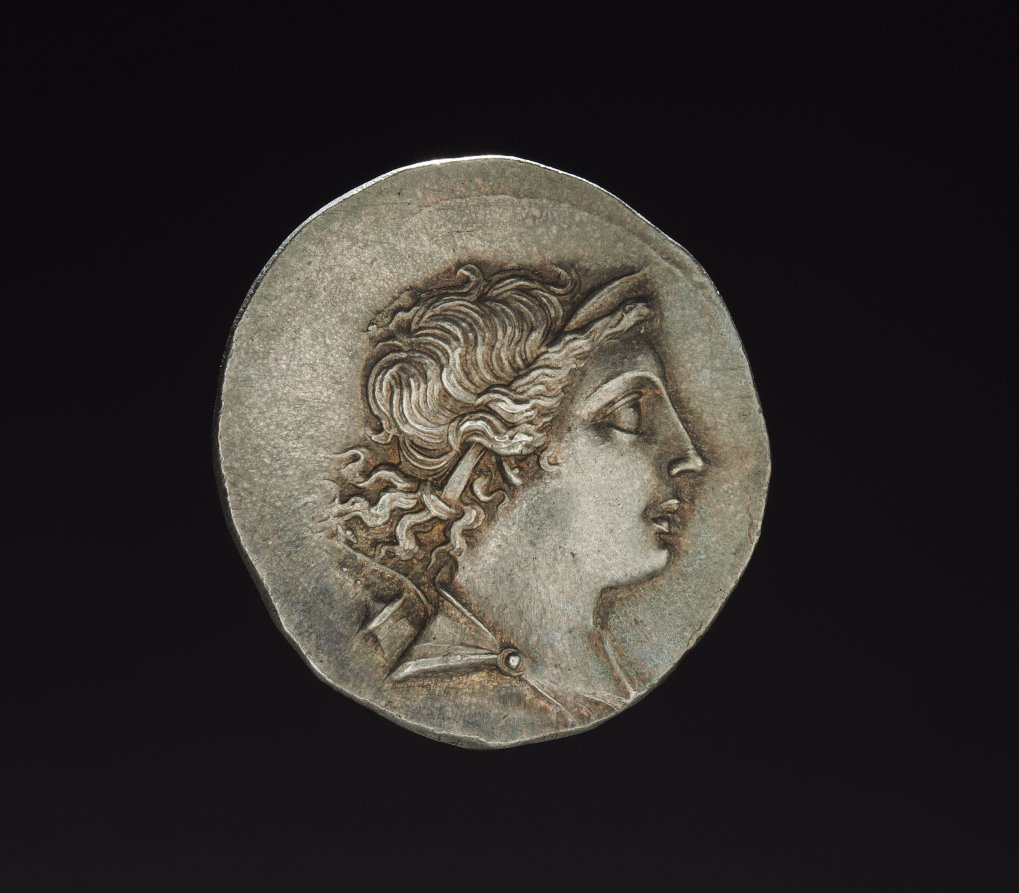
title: Tetradrachm Coin of Herognetos, Magistrate of Magnesia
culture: Turkey, Ionia, Magnesia on the Maeander, Hellenistic Period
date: 155–145 BCE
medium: silver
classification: Silver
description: The front has a bust of Artemis, a diadem circling her head and a quiver over her shoulder. On the reverse is Apollo Delphios holding a laurel branch, standing on a meander pattern, and leaning his left elbow on a tripod, all within a laurel wreath. Magnesia is located southeast of Ephesus on a tributary of the Meander River.